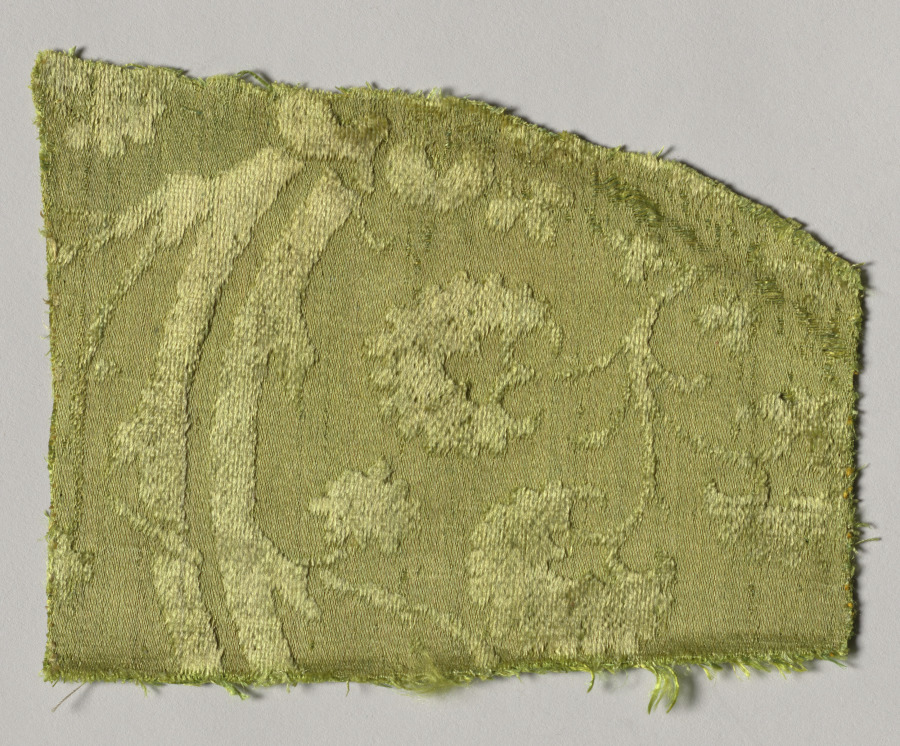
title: Fragment of a Chasuble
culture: Italy, beginning of the 15th century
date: 1400–1420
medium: velvet (cut and voided); silk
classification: Velvet